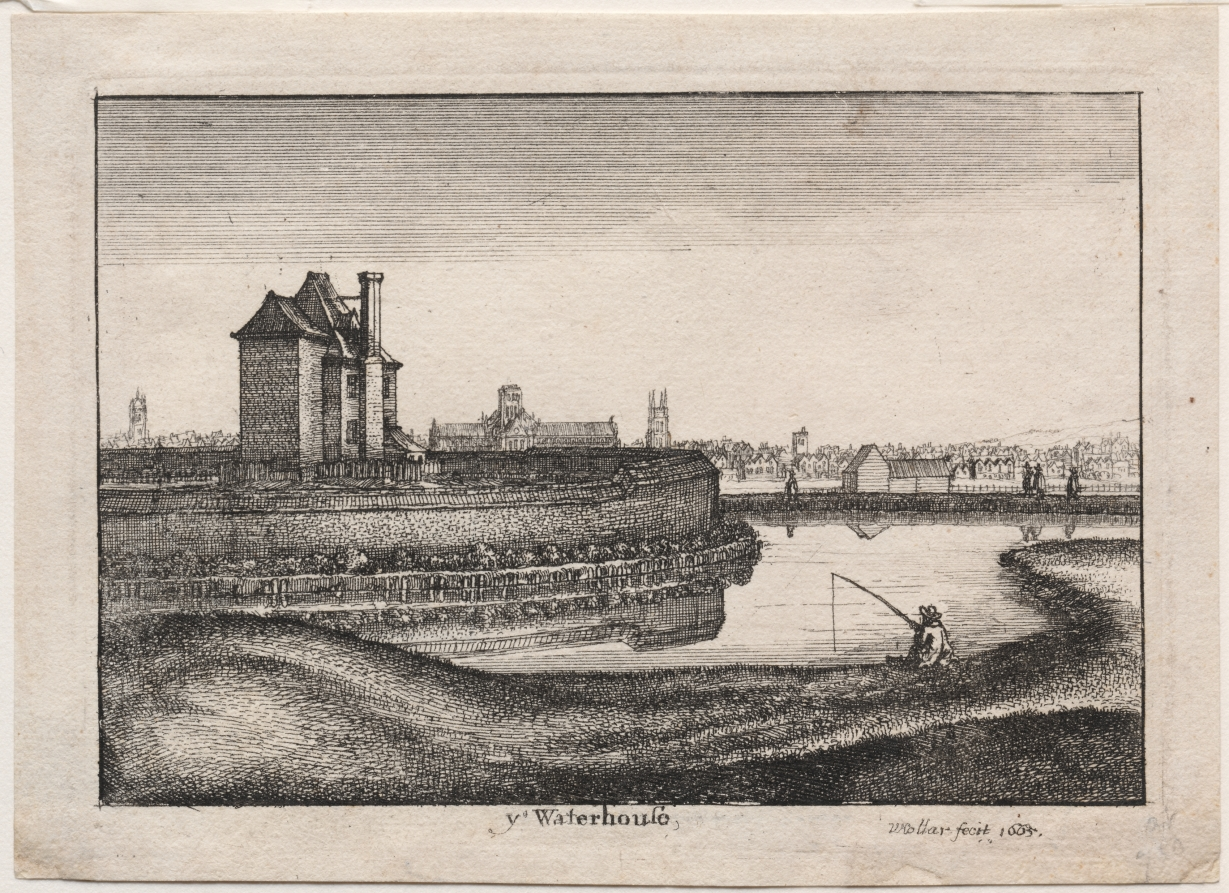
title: The Waterhouse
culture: Bohemia, 17th century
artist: Wenceslaus Hollar (Bohemian, 1607–1677)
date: 1665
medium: etching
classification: Print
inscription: inscribed, lower center, in plate: ye Waterhouse; inscribed, lower right, in plate: W. Hollar fecit 1665.